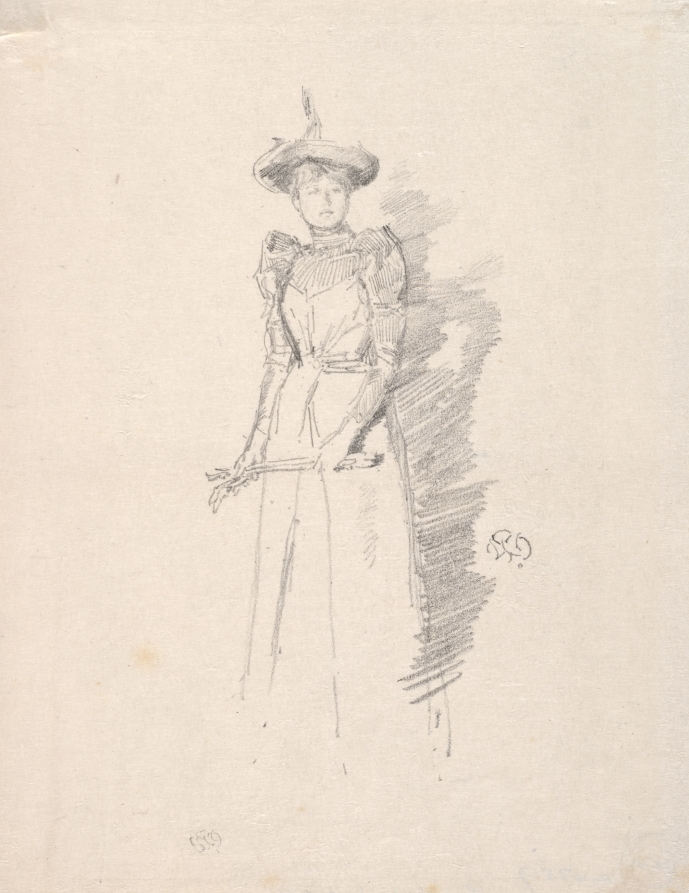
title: Gants de Suede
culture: America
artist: James McNeill Whistler (American, 1834–1903)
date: 1890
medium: lithograph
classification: Print